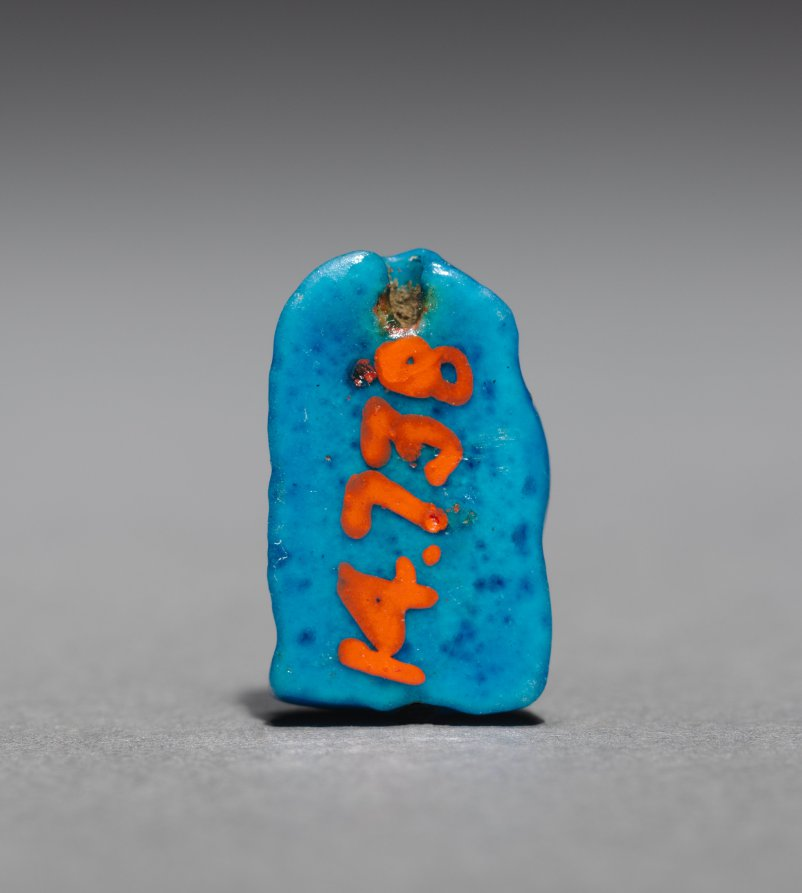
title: Hamadryas Baboon Amulet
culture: Egypt, New Kingdom (1540–1069 BCE)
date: 1540–1069 BCE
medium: faience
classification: Amulets